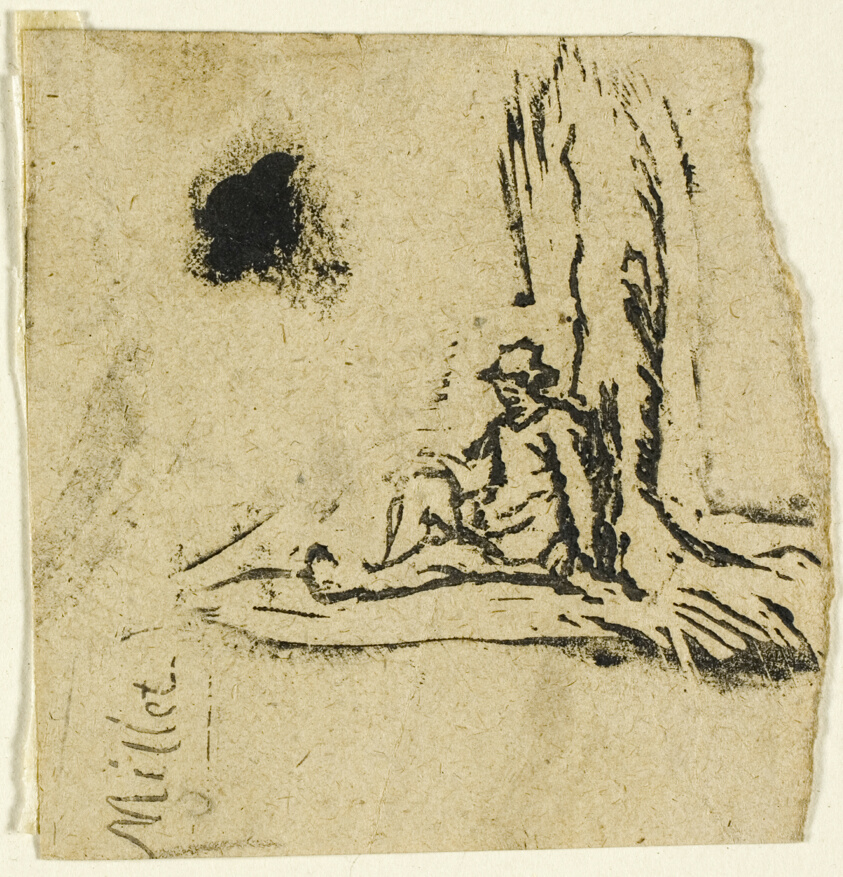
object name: Print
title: Sketches, Fragment: Peasant Seated at the Foot of a Tree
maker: Jean François Millet (French, 1814-1875)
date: after 1863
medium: Woodcut fragment from a partially inked block on tan wove China paper, and a fragment of another woodcut, verso, in dark brown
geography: France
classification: woodcut; print; prints and drawing